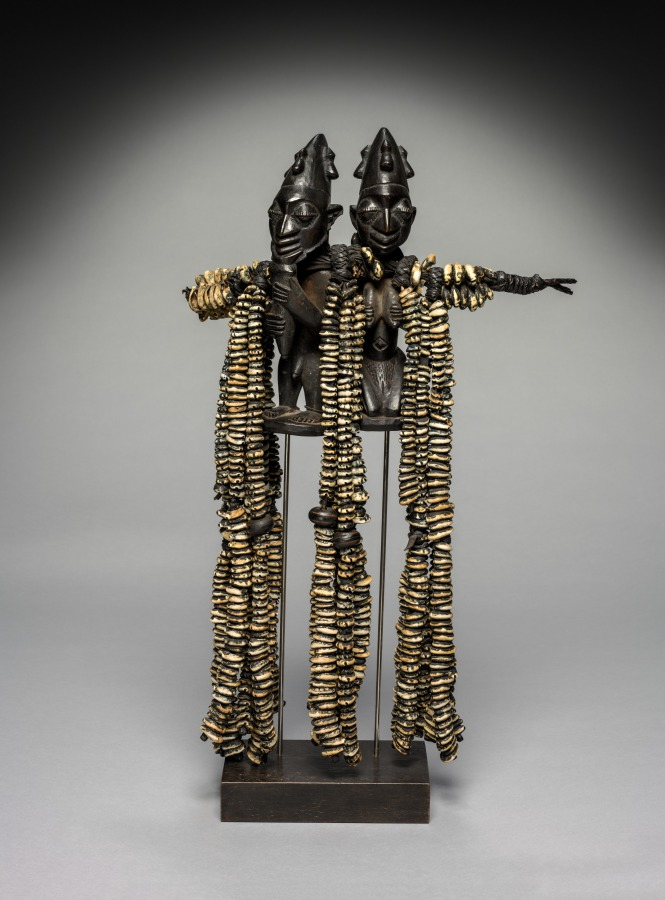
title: Dance staff for Èṣù (Ògò Èlẹ́gba)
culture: Africa, West Africa, Nigeria, Yorùbá-style maker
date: 1800s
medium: Wood, leather, cowrie shells, seeds, and natural fiber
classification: Sculpture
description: Èṣù (also called Èḷégba) embodies the most complex deity in the Yorùbá pantheon of gods. The messenger of the Yorùbá gods, Èṣù is also the bearer of sacrifices, guardian of the ritual way of life, and is associated with highly significant places including crossroads, markets, and home entrances. As seen here, Èṣù's power is often visually represented in Ògò Èḷégba (dance staffs); in this example, the unusually paired man and woman reference his ability to switch between the two genders, turn death into life (through childbirth), and to overcome the tension between the sexes. The male character bears a ritual flute reserved for this god. The abundance of cowrie shells means that Èṣù brings wealth.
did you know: If Eshu isn’t properly honored, trouble may befall the community or individual.